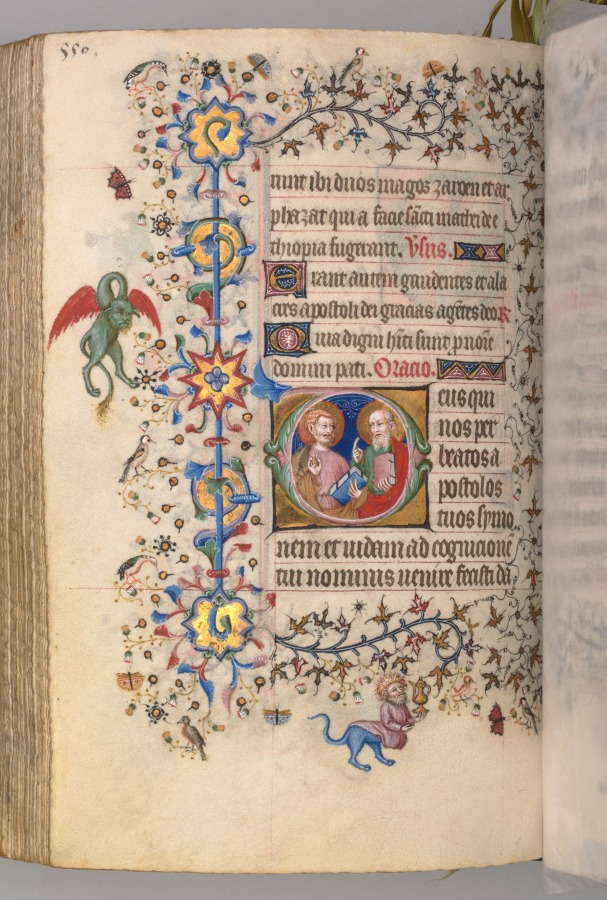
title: Hours of Charles the Noble, King of Navarre (1361-1425): fol. 269v, SS. Simon and Judas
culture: France, Paris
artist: Master of the Brussels Initials and Associates (French)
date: c. 1405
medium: ink, tempera, and gold on vellum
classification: Bound Volume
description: This precious volume was obviously highly prized by its owner, the French-born King of Navarre, who had his coat of arms painted on no less than twenty folios. Rather than directly commissioning this manuscript from a specific workshop, it seems that Charles the Noble acquired his book of hours -- perhaps ready-made for the luxury market -- while on a trip to Paris in 1404-05. A collaborative effort, six painting styles are evidenced within the pages of this codex, those of two Italians, two Frenchmen, and two Netherlanders. The painter who was responsible for the planning and decoration of the book, and who produced seventeen of the large miniatures, was a Bolognese artist known as the Master of the Brussels Initials. His principal assistant, responsible for most of the borders, was a Florentine who signed his name "Zecho" da Firenze on folio 208 verso.